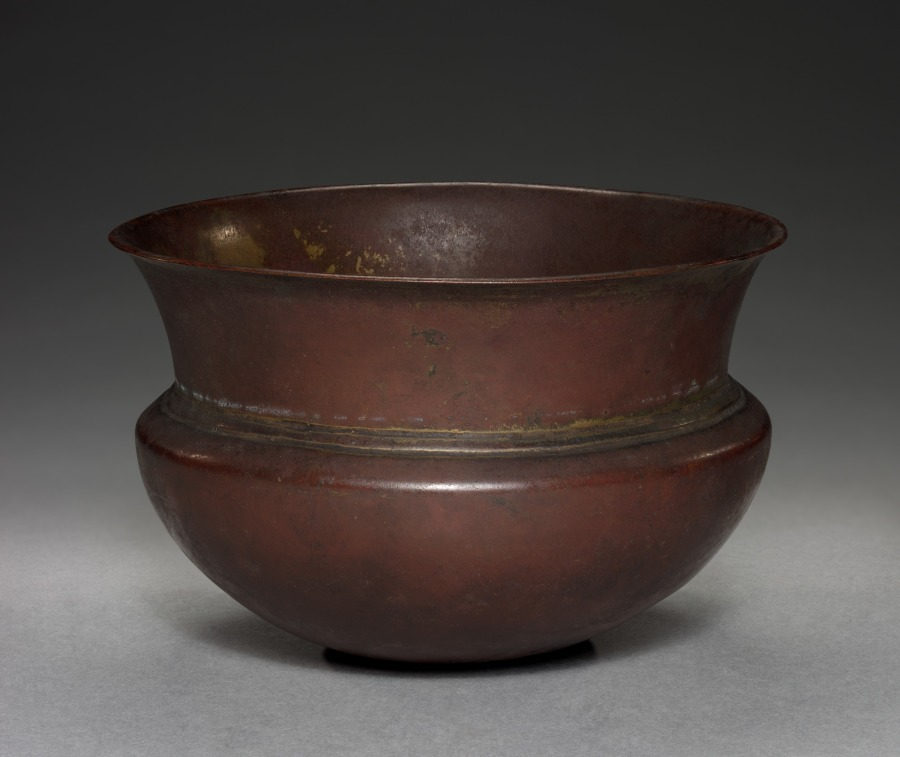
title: Deep Bowl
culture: Egypt, Greco-Roman period (332 BCE–395 CE), Ptolemaic dynasty (305–30 BCE) or modern forgery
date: 305–30 BCE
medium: bronze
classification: Vessels